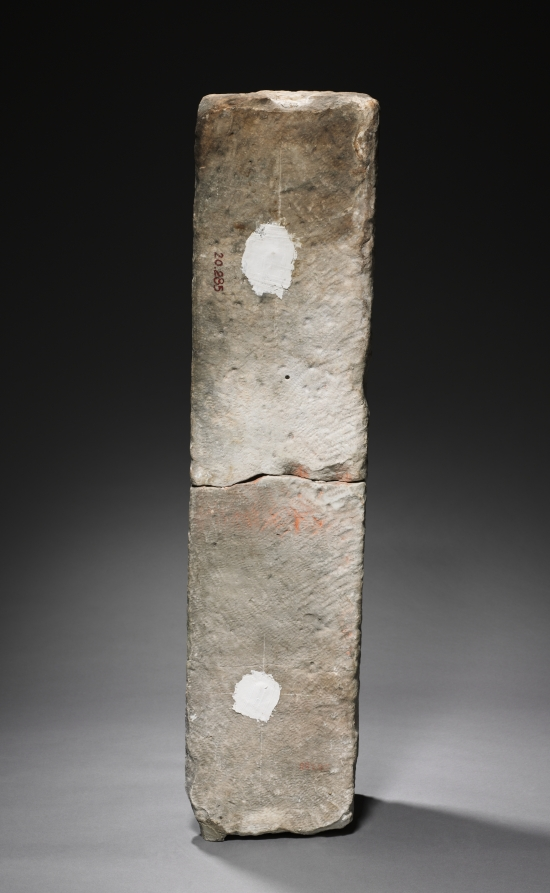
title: Transenna Post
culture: Lombardic, Italy, Rome, Migration period, 8th-9th Century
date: 700s-800s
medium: marble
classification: Sculpture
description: In Christian architecture a transenna is an openwork screen of stone or metal enclosing a shrine. These transenna elements were found in Rome; the posts were said to have been excavated on the Coelian Hill and may have originally formed part of the transenna of the Church of San Saba. The Lombards were an ancient Germanic-speaking tribe that settled in Italy after 568. Their artistic tradition was originally centered on small objects of personal adornment like buckles and brooches. After occupying Italy, the Lombards found themselves in contact with large-scale sculpture of classical and early Christian origin that, by the end of the 700s, they had learned to adopt and imitate, as seen here.